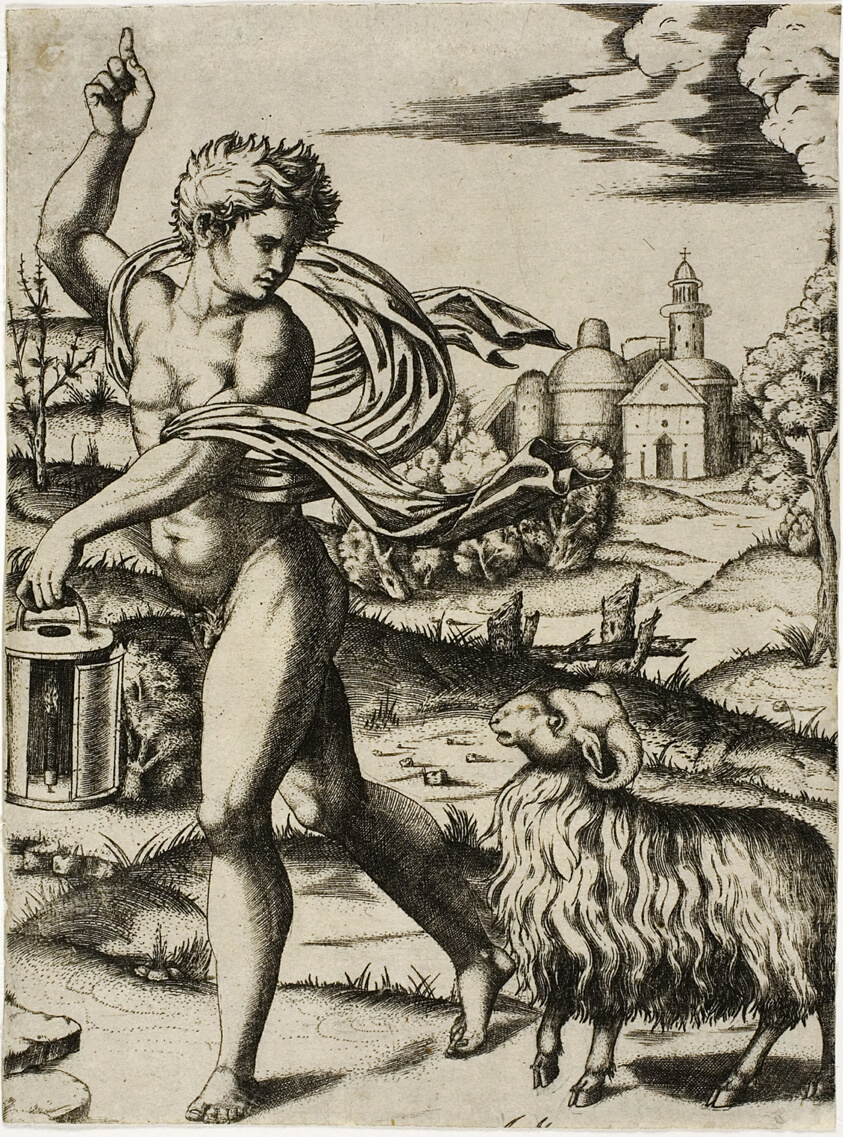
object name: Print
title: Sign of the Ram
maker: Marcantonio Raimondi (Italian, c. 1480-1534)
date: c. 1509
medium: Engraving printed in black on paper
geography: Italy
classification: engraving; print; prints and drawing